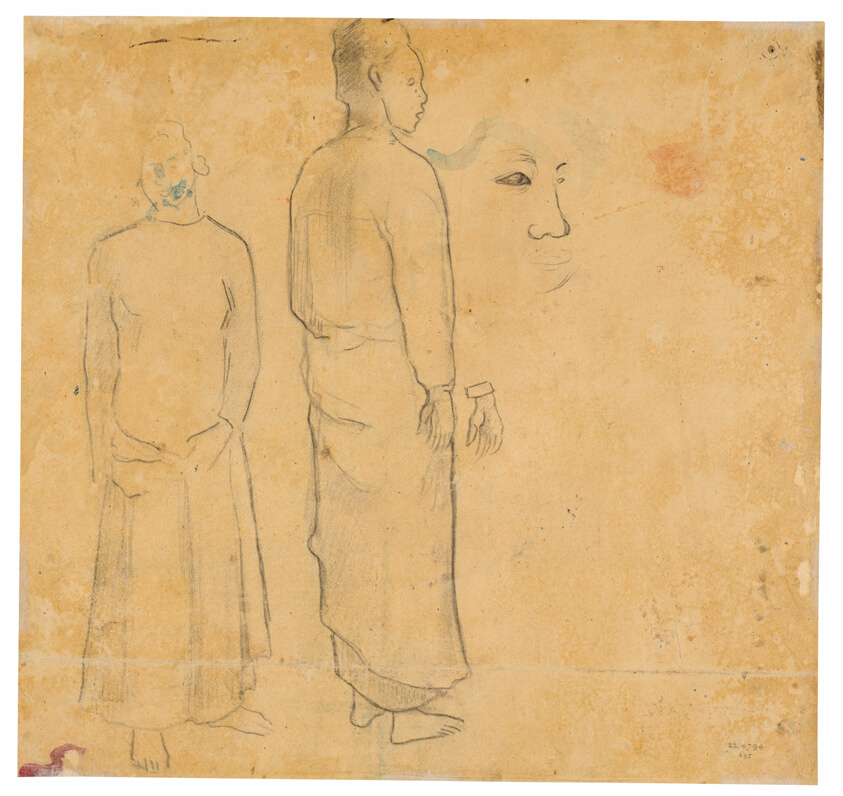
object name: Drawing and Watercolor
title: Two Figures (related to the painting Tahitian Landscape)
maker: Paul Gauguin (French, 1848-1903)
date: 1891/93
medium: Black chalk, with touches of watercolor and watercolor offset on cream wove paper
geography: France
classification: prints and drawing; drawings (visual works); chalk